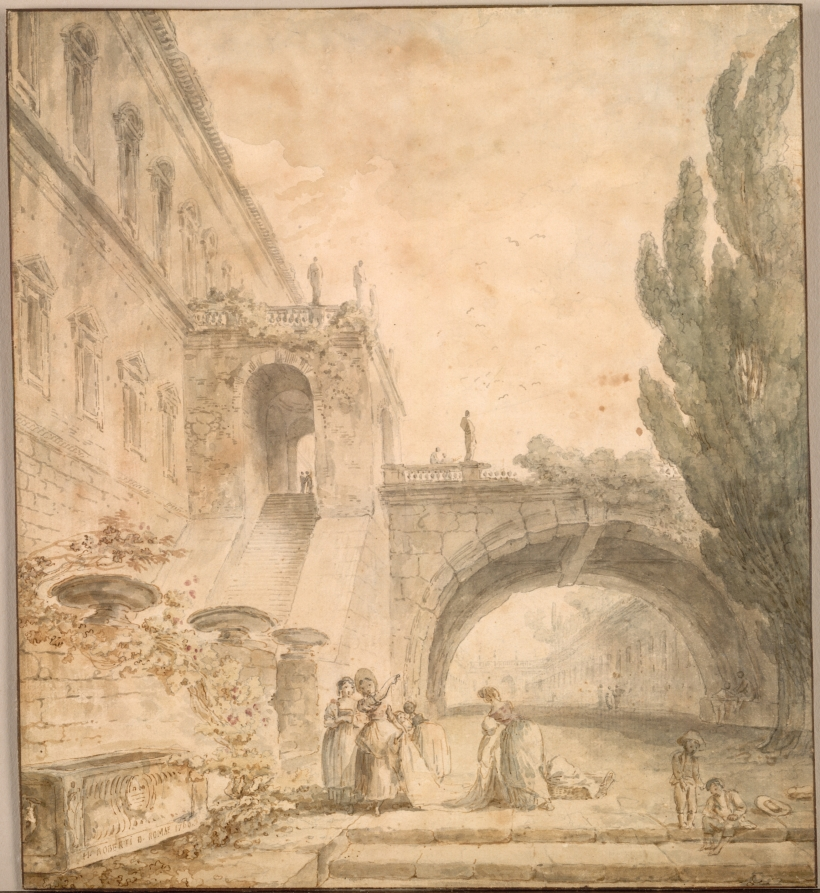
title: A Palace with an Arched Bridge (A Roman Villa)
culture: France, 18th century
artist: Hubert Robert (French, 1733–1808)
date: 1760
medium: pen and brown and gray ink, graphite, and watercolor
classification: Drawing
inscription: Signed and dated, lower left (on water trough) in brown ink: "H. Roberti D. Romae 1760"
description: Hubert Robert had been living in Rome for five years when he executed this watercolor. He was fascinated by the architecture and gardens he saw in Italy and became especially interested in the picturesque interaction between Italy's rich artistic past and the daily life he saw on the streets. This sheet does not represent an actual view. It is, rather, an invention of the artist, who liked to create architectural fantasies by combining the different types of structures he became familiar with in Rome. Here, he enlivened the view with washerwomen doing laundry.